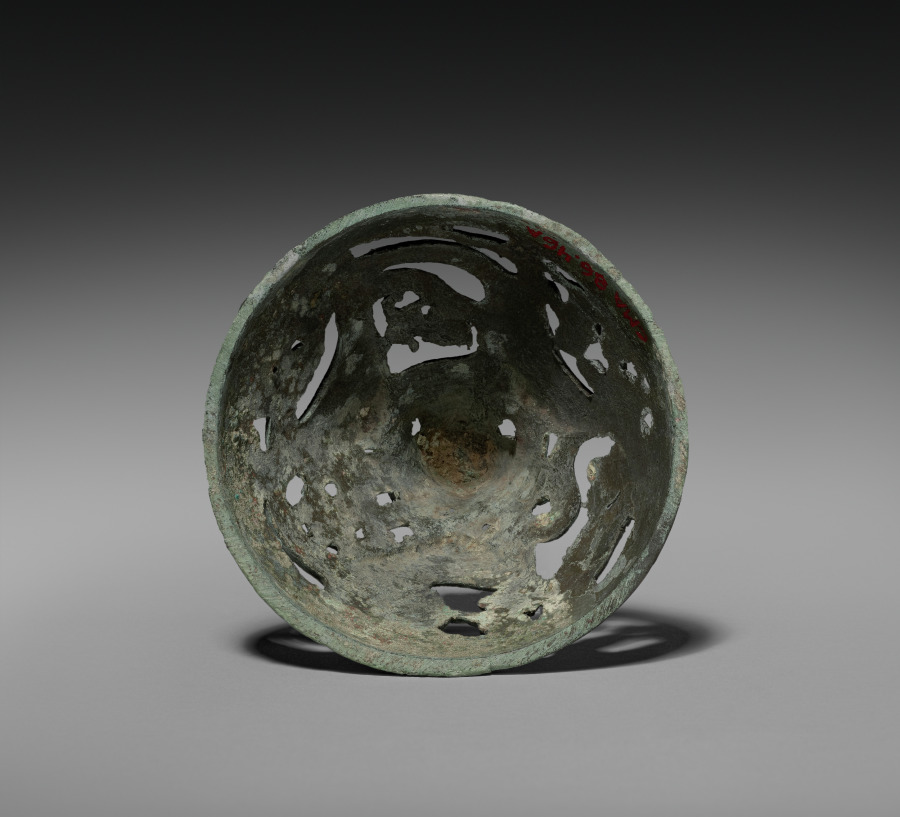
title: Incense Burner (Boshan Lu)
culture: China, Western Han dynasty (206 BCE–8 CE)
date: 200–100 BCE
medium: bronze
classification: Metalwork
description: The conical cover of this incense burner represents a miniature mountain with hunting scenes. The cover was shrouded in mist and emanated intoxicating smoke through its openwork when fragrant woods and herbs were burnt in its stem cup, transporting its beholder into an imaginative realm.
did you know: Deities (appearing as hunters) and fantastic beasts roam freely among mists and clouds on this incense burner.